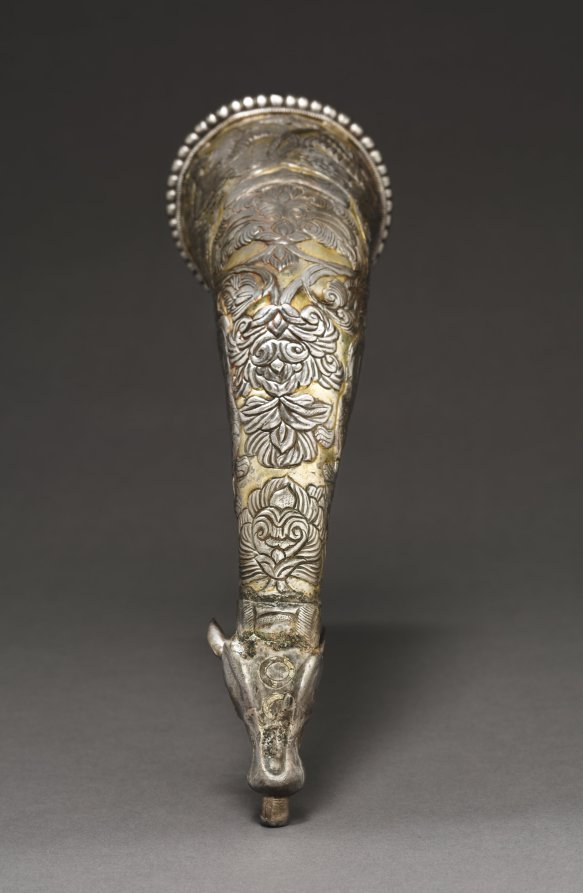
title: Rhyton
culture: Central Asia (Sogdiana) or Tibet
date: c. late 600s–early 700s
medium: silver with gilded foil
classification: Silver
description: The form of the animal-headed rhyton as a drinking vessel and the use of silver are evidence of cultural exchange with Persia, while the lush, luxurious quality of the design and the form of the lions and curling dragon on one side of the decanter reveal an awareness of Chinese forms. Poured into the large opening at the top of the horn, wine then flowed out through the small tube held between the parted lips of a bovine-like animal. To keep from spilling, drinkers could stop the flow of the liquid by holding a thumb over the lower aperture.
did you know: This drinking horn was a communal vessel which guests would pass around to share wine at parties.